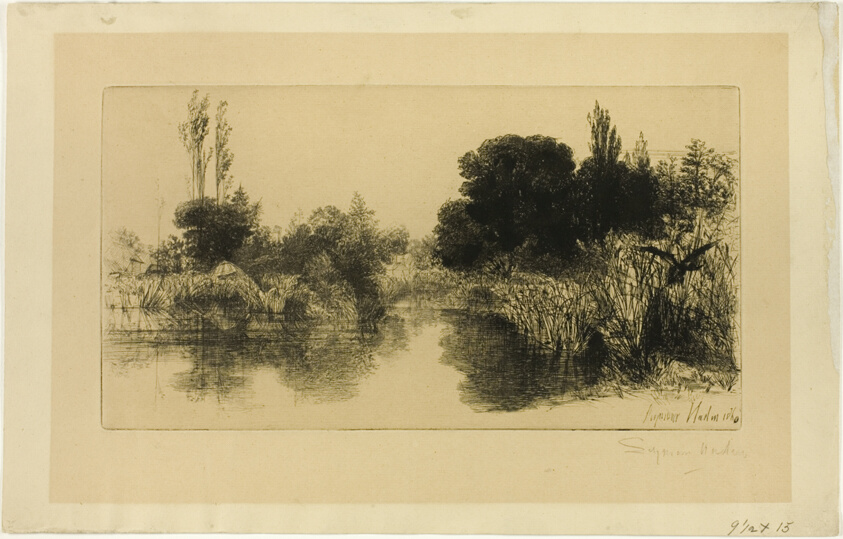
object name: Print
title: Shere Mill Pond, No. II (large plate)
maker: Francis Seymour Haden (English, 1818-1910)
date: c. 1860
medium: Etching with drypoint on cream wove paper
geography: England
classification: etching; print; prints and drawing